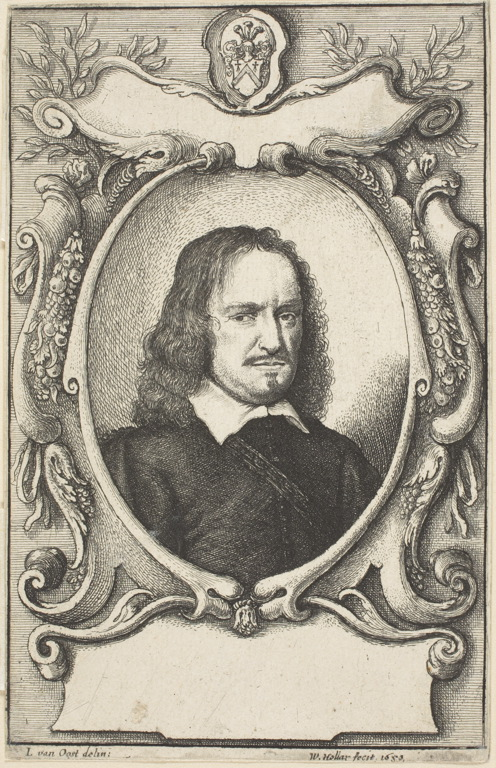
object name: Print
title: Vincent Stochove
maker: Wenceslaus Hollar (Bohemian, 1607-1677); after Jacques van Oost I (Flemish, 1601-1671)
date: 1650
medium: Etching on ivory laid paper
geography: Bohemia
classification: etching; print; prints and drawing